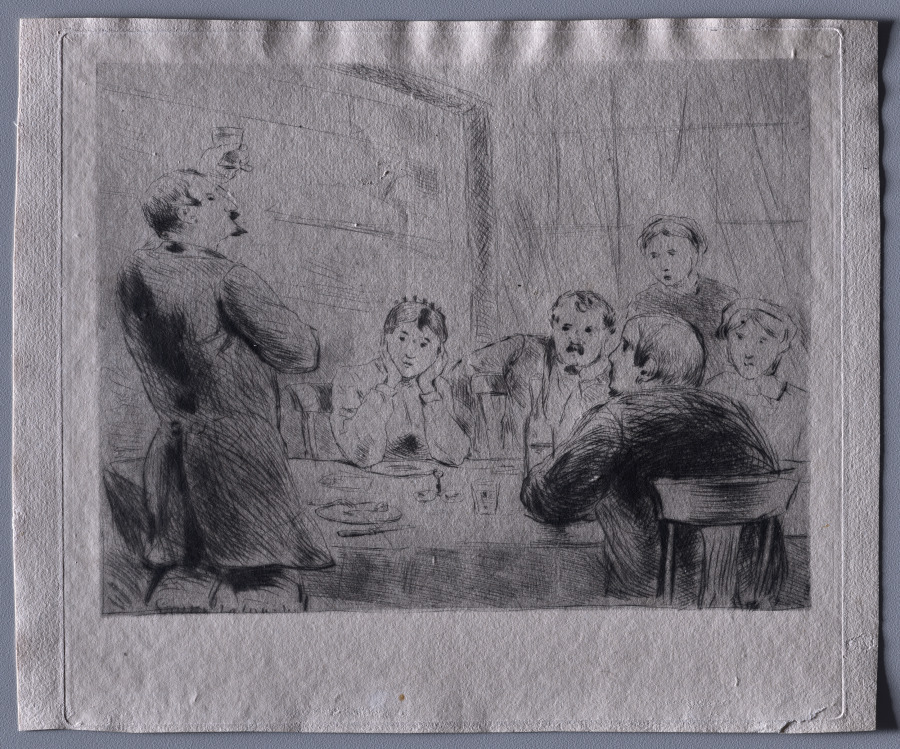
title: Untitled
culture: France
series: L'Assommoir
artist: Gaston de Latouche (French, 1854–1913)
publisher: Cadart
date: 1879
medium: drypoint on laid paper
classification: Print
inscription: Signed, in plate, at lower left: Gaston La Touche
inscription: Watermark: D.C. BLAUW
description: Although his work changed throughout his career, early on Gaston de Latouche belonged loosely to the Impressionist circle through his association with Édouard Manet. Latouche explored subjects—such as that seen here—taken from the lives of working-class Parisians. This print represents a scene from naturalist author Émile Zola’s novel L’Assommoir, which detailed the rise and fall of a laundress named Gervaise. Latouche is said to have collaborated with the author on the imagery and exhibited the entire series at the public Paris Salon in 1879.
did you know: Gaston de LaTouche completely changed the subjects and style of his work around 1890 and destroyed much of his early work.